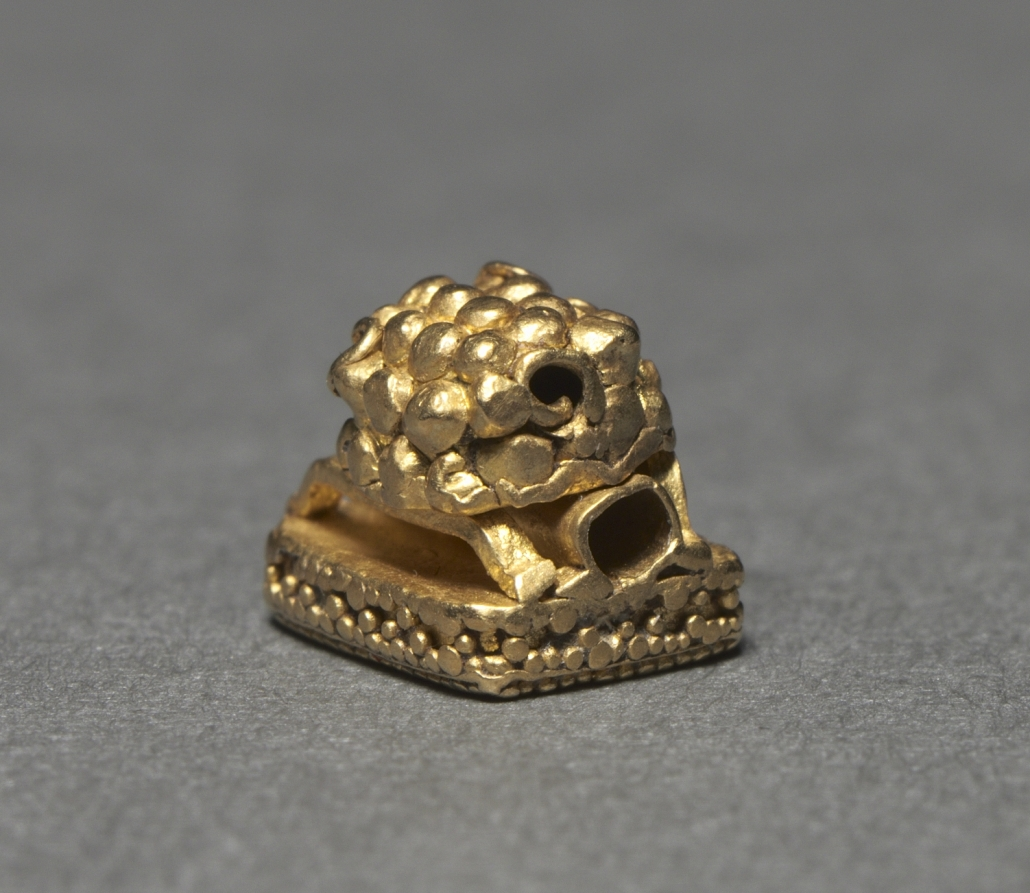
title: Hedgehog Jewelry Element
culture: Western Asia, Scythian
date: 400–200 BCE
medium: gold, soldered or fused with granulation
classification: Sculpture